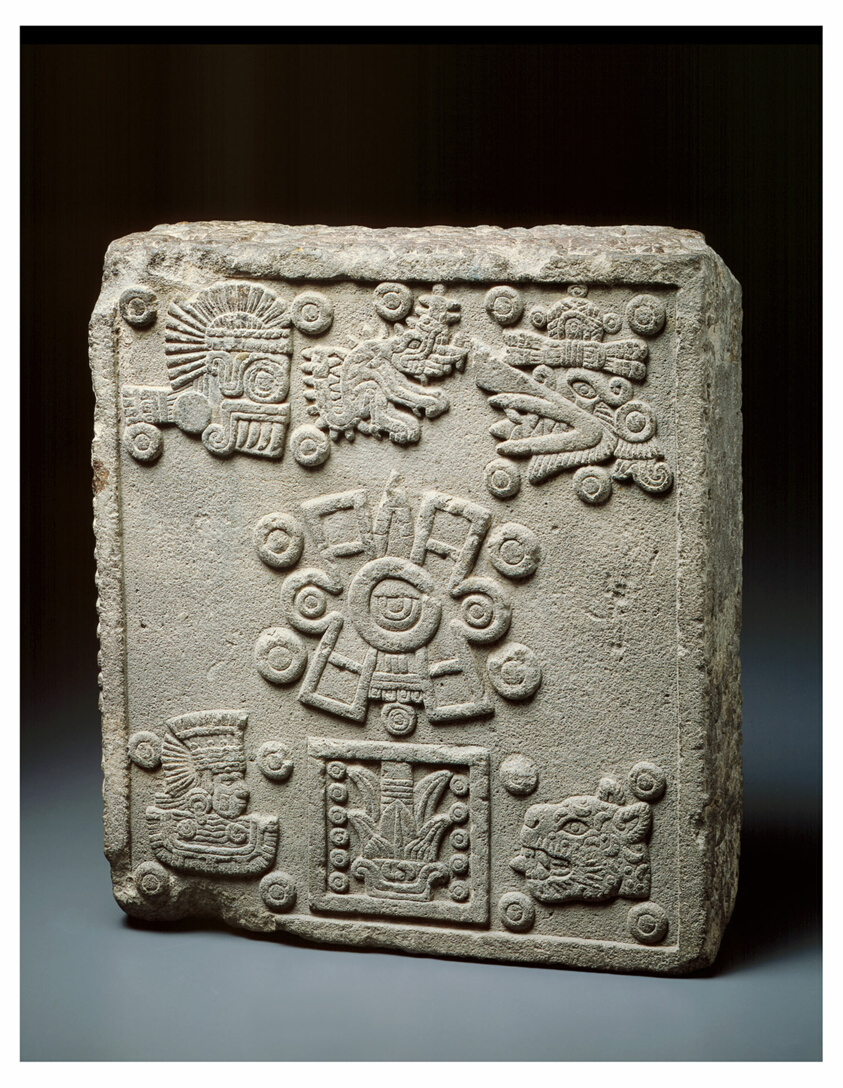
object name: Sculpture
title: Coronation Stone of Motecuhzoma II (Stone of the Five Suns)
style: aztec, mesoamerican, Pre-Columbian, americas, Arts of the Americas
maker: Aztec (Mexica) (Tenochtitlan, Mexico)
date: 1503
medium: Basalt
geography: Tenochtitlan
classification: ceremonial object; stone; art of the americas; sculpture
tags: architecture, history, coronations, animals, record of events, Hieroglyphs, Mexico, Aztecs, mythology, kingship, rulers (people), goddesses